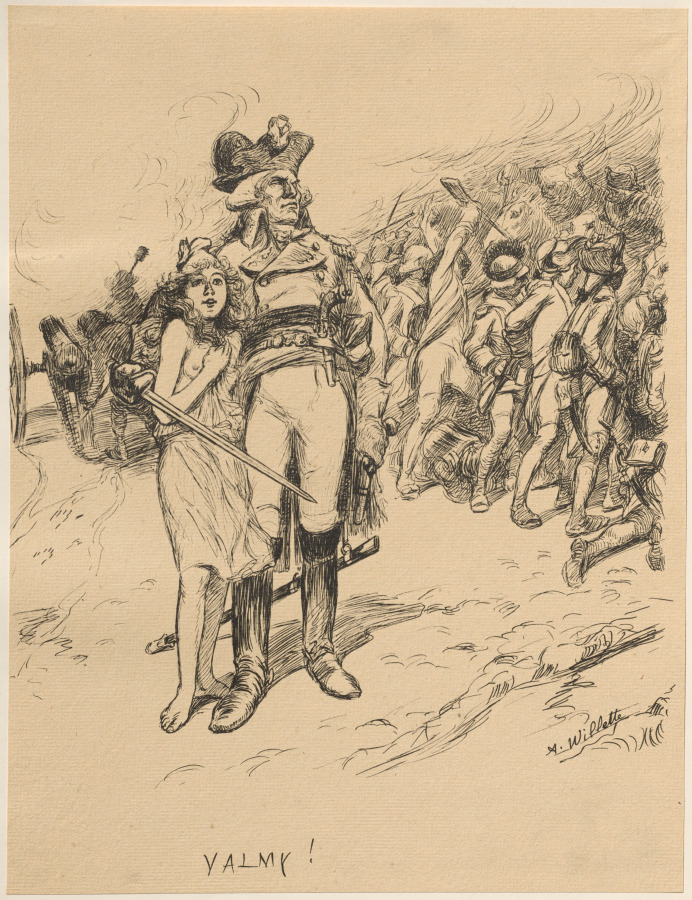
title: Valmy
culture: France, 19th century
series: L'Estampe Moderne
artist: Adolphe Léon Willette (French, 1857–1926)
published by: Imprimerie Champenois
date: 1899?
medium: lithograph from bound volume containing 50 lithographs, each with a tissue paper guard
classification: Bound Volume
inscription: lower right margin of sheet: A. Willette; lower margin of sheet: VALMY !; left margin of sheet: watermark with VD & L inscribed within four arched decorative flourishes; lower right corner of secondary support: blindstamp of L'Estampe Moderne (Lugt 2790)